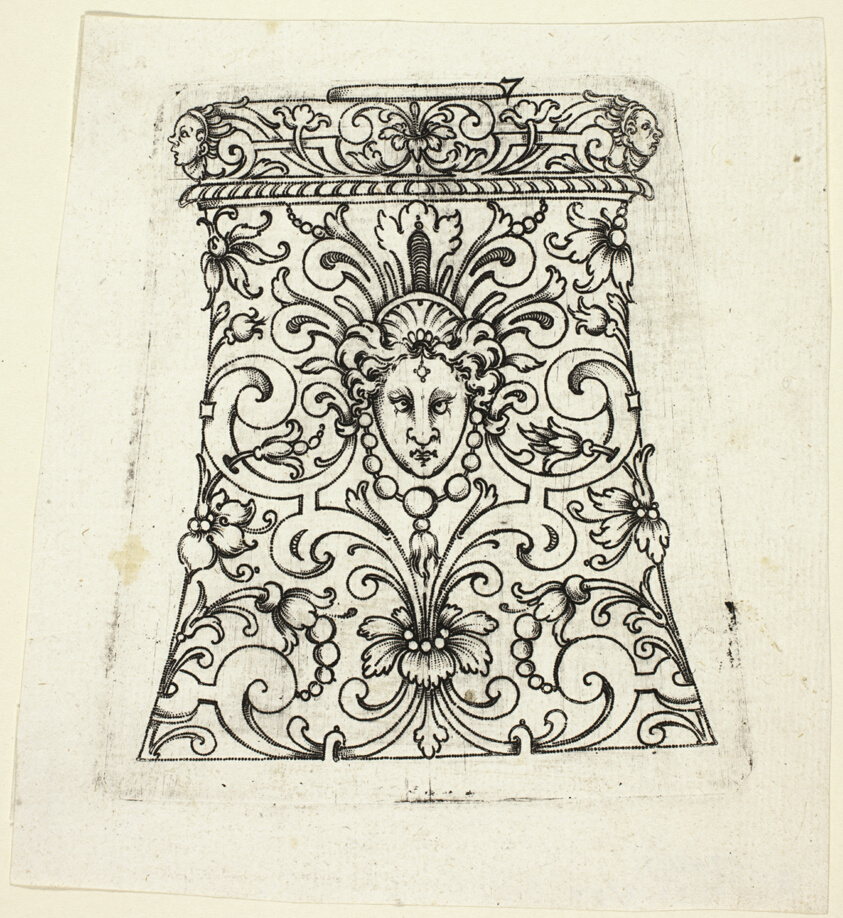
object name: Print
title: Plate 7, from twenty ornamental designs for goblets and beakers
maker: Master A.P. (German, active early 17th century)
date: 1604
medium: Punch engraving in black on ivory laid paper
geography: Germany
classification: engraving; print; prints and drawing